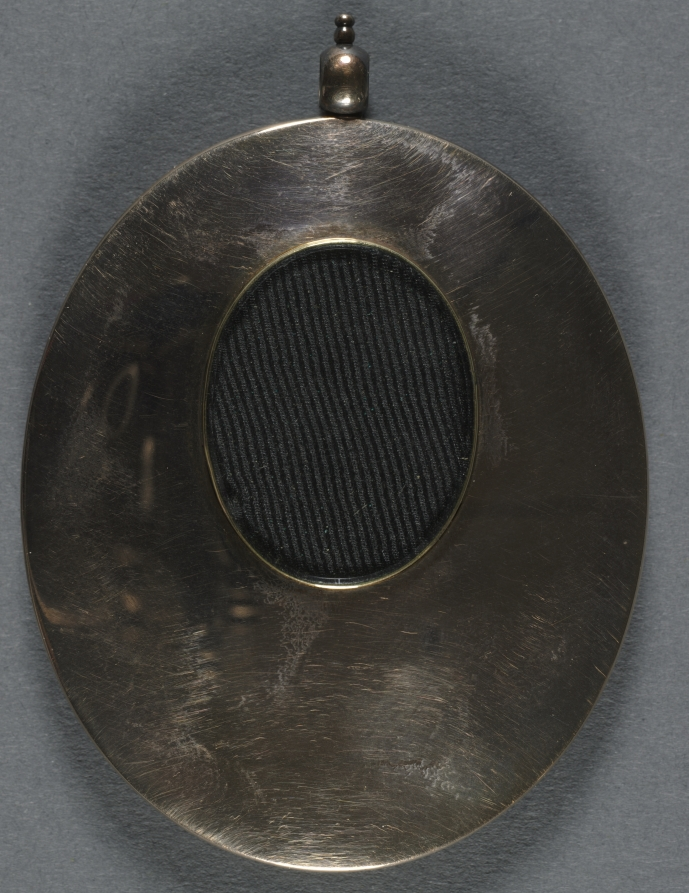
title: Portrait of a Woman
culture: America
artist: Anna Claypoole Peale (American, 1791–1878)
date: 1820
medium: watercolor on ivory on a gilt metal locket with red leather case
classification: Portrait Miniature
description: As a child, Anna Claypoole Peale observed her father James Peale painting miniature portraits and practiced alongside him. She eventually rivaled his success and became one of the leading portrait miniaturists in American during the 1800s. The sitter’s identity is unknown, but her likeness has been skillfully rendered to emphasize her rosy cheeks, pale skin, and red lips. This object was likely gifted as a sentimental memento to a loved one.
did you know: A compartment on the back of this painting may have originally contained a lock of the sitter’s hair.